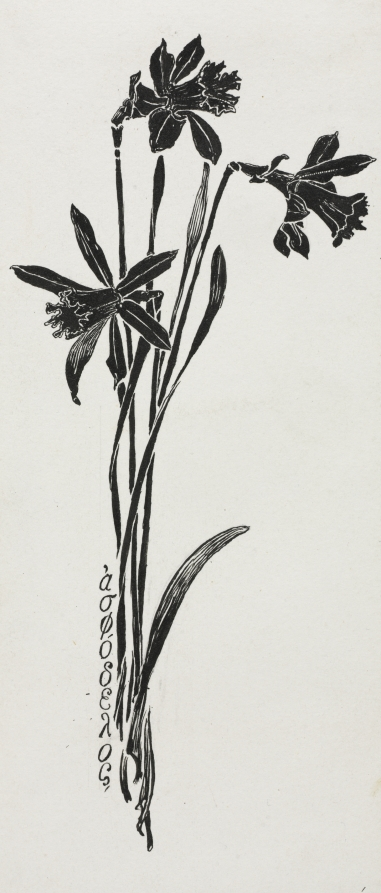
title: Daffodils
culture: America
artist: Harry Fenn (American, 1838/45–1911)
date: c. 1857–1911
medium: pen and ink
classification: Drawing